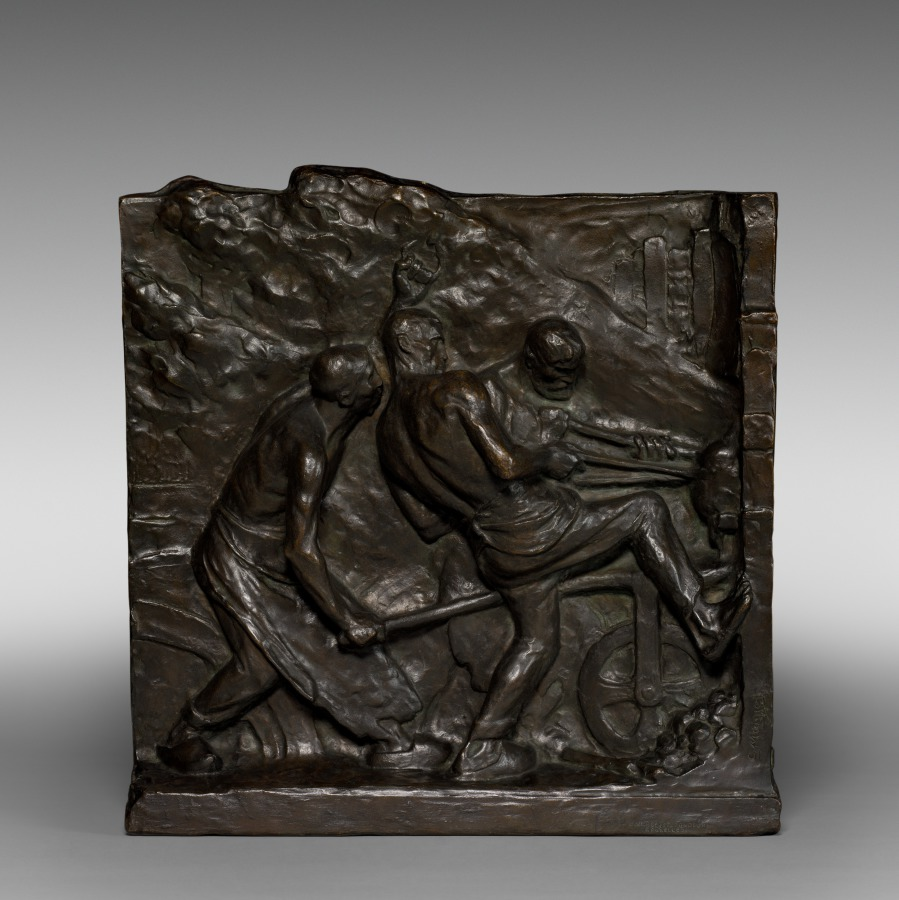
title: The Furnace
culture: Belgium, 19th century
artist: Constantin Meunier (Belgian, 1831–1905)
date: c. 1890 – 1900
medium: bronze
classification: Sculpture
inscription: Signed lower right side: "C. Meunier"; inscribed lower right: "B. Verbeyot, Fondeur, Bruxelles."